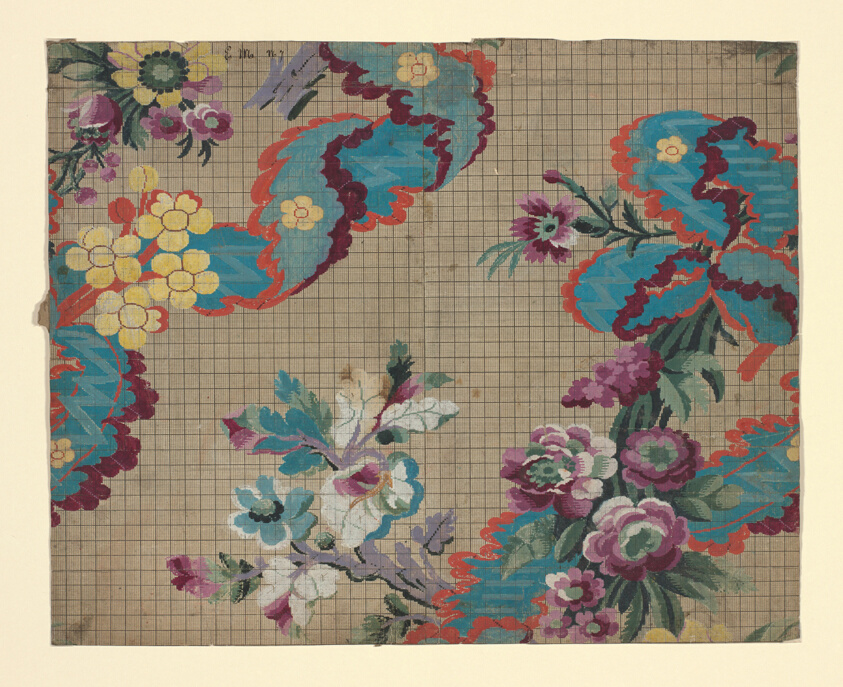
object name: Drawing and Watercolor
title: Mise-en-carte (Point-paper)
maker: Designed by L. Galy Gallien et Compe (1761–1770); France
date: 1764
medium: Ink and gouache on hand drawn graph paper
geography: France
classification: textile; accessory - paper design